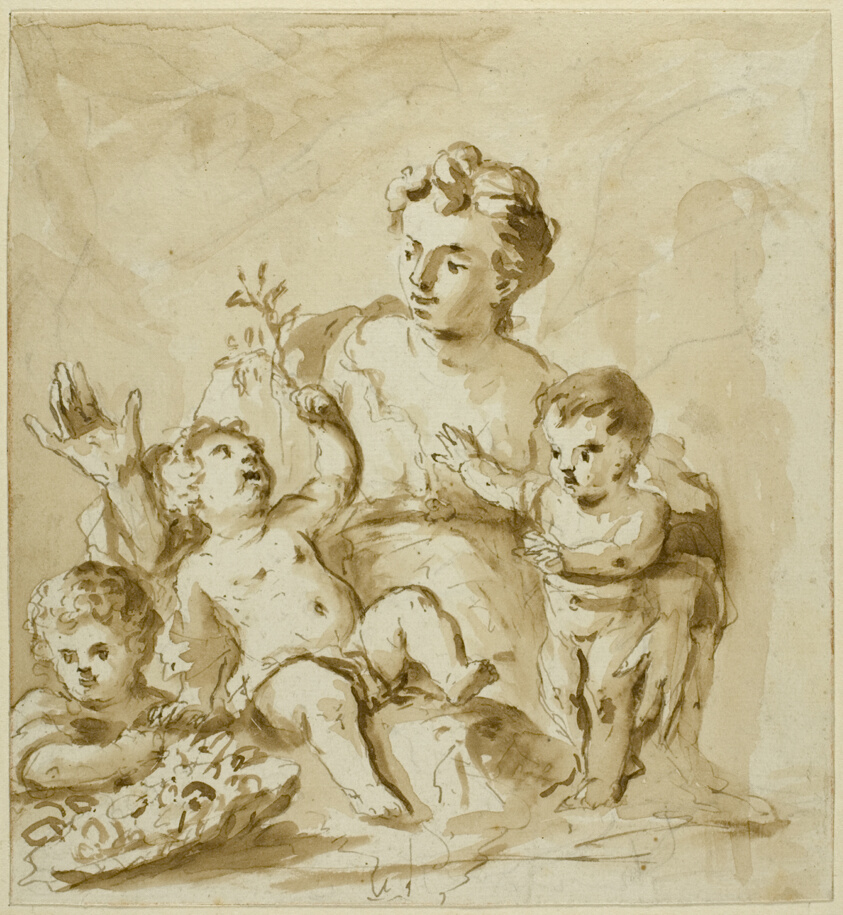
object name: Drawing and Watercolor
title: Charity with Mother (Mother with Three Infants)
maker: Unknown artist; Venetian, 18th century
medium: Pen and brush and brown ink and brown wash, over traces of charcoal, on ivory laid paper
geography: Italy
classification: pen and ink drawings; drawings (visual works); prints and drawing